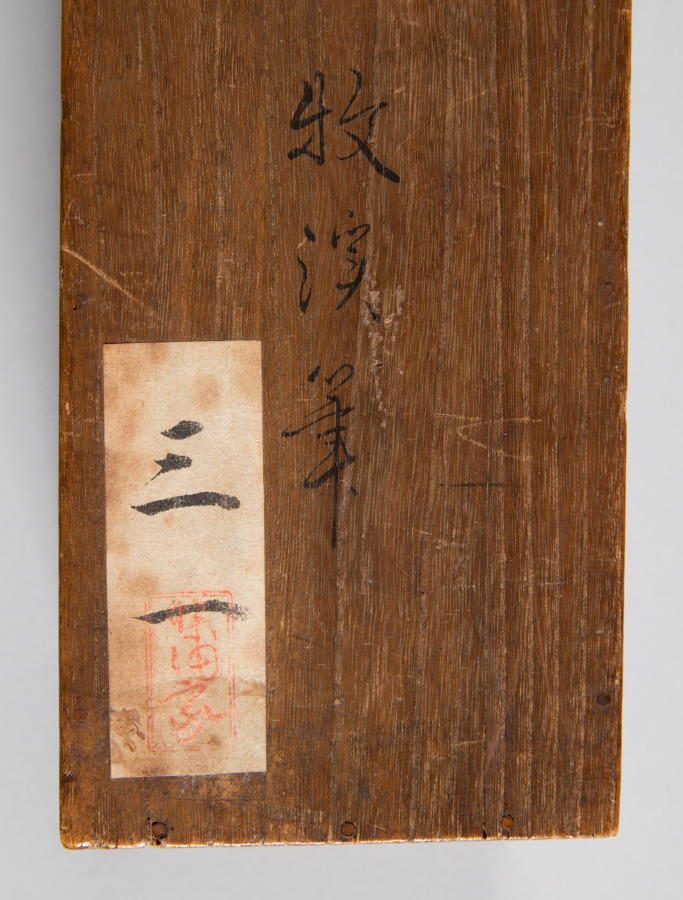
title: Reeds and Geese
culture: Japan, Kamakura period (1185–1333)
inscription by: Yishan Yining [Issan Ichinei] (Chinese, 1247–1317)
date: 1314–17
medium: hanging scroll; ink on paper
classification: Painting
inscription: signed: Issan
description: Reeds and geese has been a common pairing in Chinese literary and visual culture for many centuries. This painting presents the contribution of a Japanese amateur painter, almost certainly a Zen Buddhist monk, to Japan’s fledgling efforts to add the theme to its own cultural vocabulary in the early 1300s. As was customary at the time in Japan, the painter did not sign or seal his work; the inscription, a poem added to the painting by the eminent émigré monk Yishan Yining, along with his signature and seal, was of far greater cultural value. Today, the modestly sized painting has tremendous significance as one of the earliest surviving examples of Japanese ink paintings with reeds and geese.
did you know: Tokyo National Museum owns a copy of this painting made by Kano Gyokusen (1796–1864) when he was 14 years old.